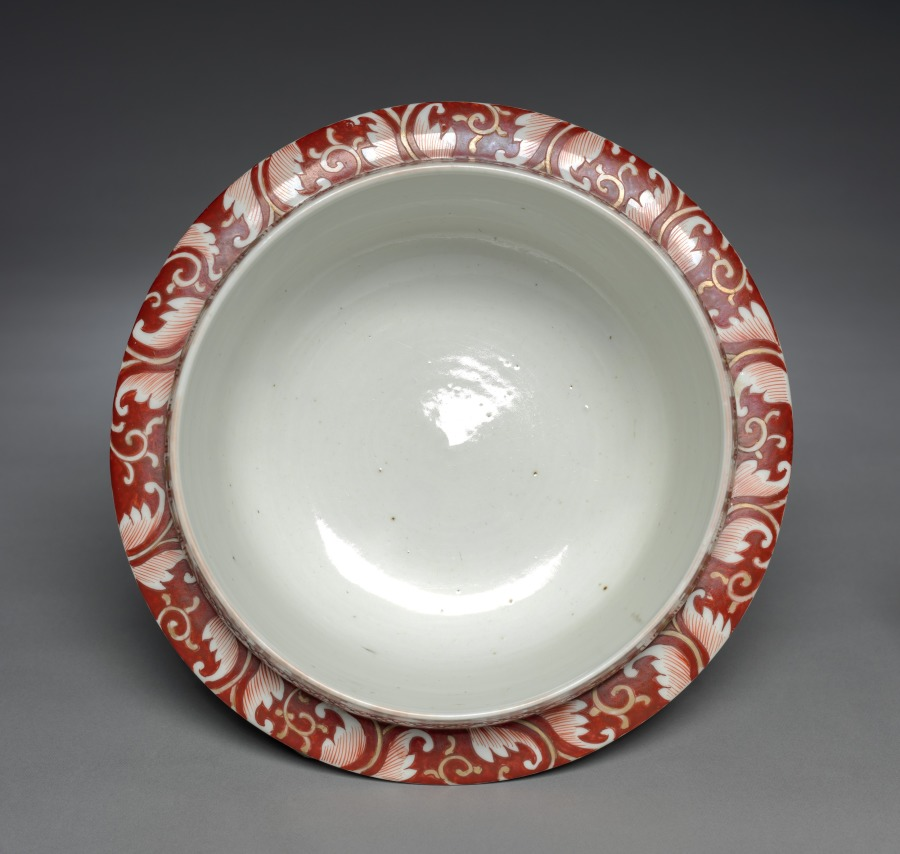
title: Rice Container: Ko Imari Type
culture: Japan, Edo period (1615–1868)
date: late 1600s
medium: porcelain with overglaze enamel and gold decoration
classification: Ceramic